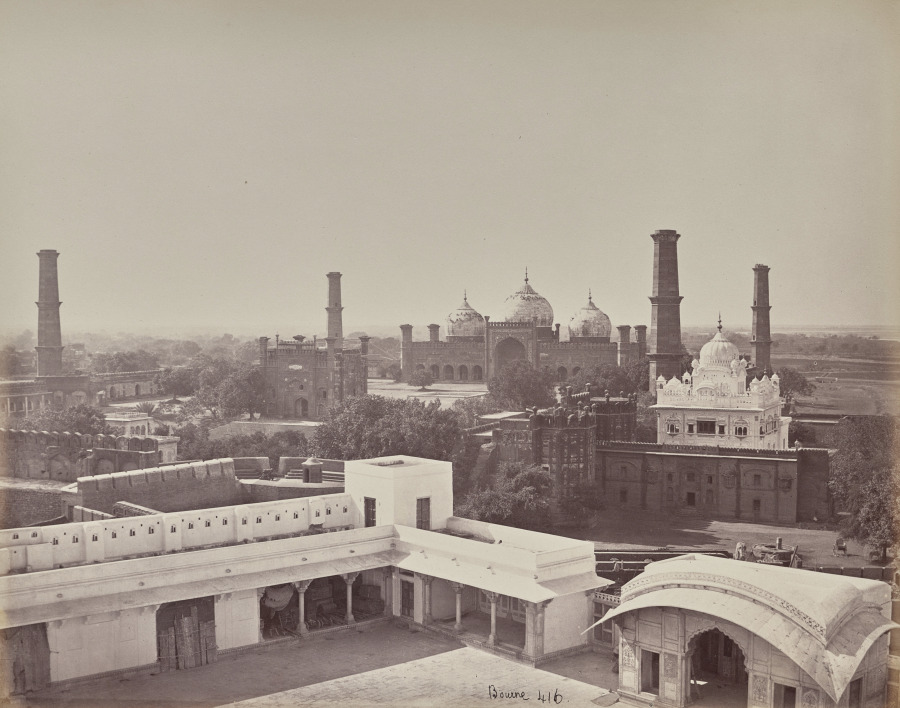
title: View of the City of Lahore Taken from the Roof of the Palace in the Fort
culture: England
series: Photographs of Northern India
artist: Samuel Bourne (British, 1834–1912)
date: 1863–70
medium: albumen print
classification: Photograph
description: The 50 images in this album, all taken in the 1860s, move from the hill towns of the Himalayas down to cities including Lahore (now in Pakistan), Delhi, Lucknow, Agra, Benares (now Varansi), and Calcutta (now Kolkata). Architectural studies of major monuments offer valuable historical records of what sites such as the Taj Mahal and the imperial mosque of the Mughal emperors in Delhi looked like before twentieth-century restorations.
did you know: Samuel Bourne, the author of most the images in this album, was a banker in England before he moved to India to become a professional photographer.